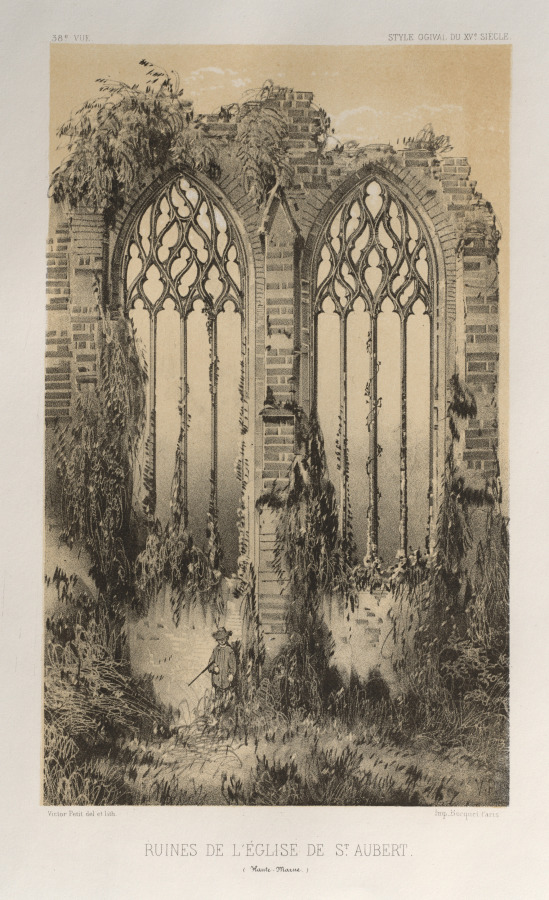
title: Architecture Pittoresque ou Monuments des xveme. Et xvieme. Siecles: Chateaux De France des XV et XVI Siecles: Pl. 38, Ruines De L'Église De St. Aubert (Haute-Marne)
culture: France, 19th century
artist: Victor Petit (French, 1817–1874)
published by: Charles Boivin (publisher and editor); Lith de Godard a Paris (printer)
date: 1860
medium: lithograph with tint stone, from portfolio of 100 lithographs with tint stone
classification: Print